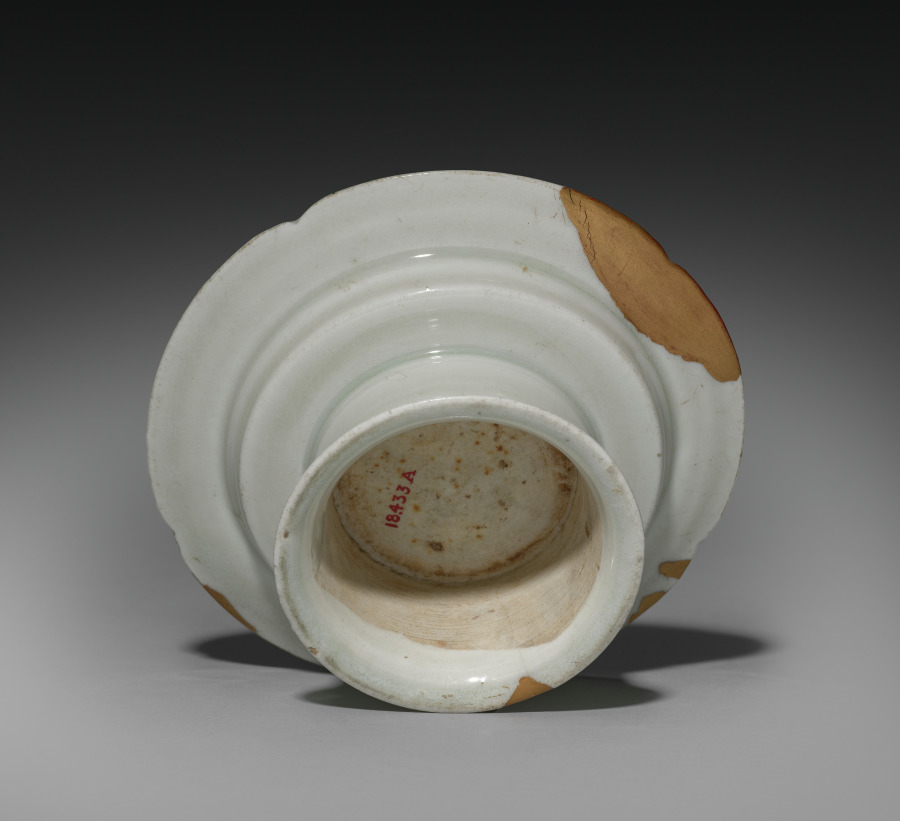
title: Cup and Stand (stand)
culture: Korea, Goryeo dynasty (918–1392)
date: 918–1392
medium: pottery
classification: Ceramic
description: As early as the seventh century, the practice of drinking tea and wine became an important part of elite culture in Korea. Elites of the Goryeo period commissioned a variety of types of utensils and vessels including this delicate-looking cup and cup stand, not only to make their drinking experience more exciting, but also to show their refined taste.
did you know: Elites of the Goryeo period are known for their love of drinking tea and wine. This type of delicate-looking stoneware was buried in the tombs of ruling elites.